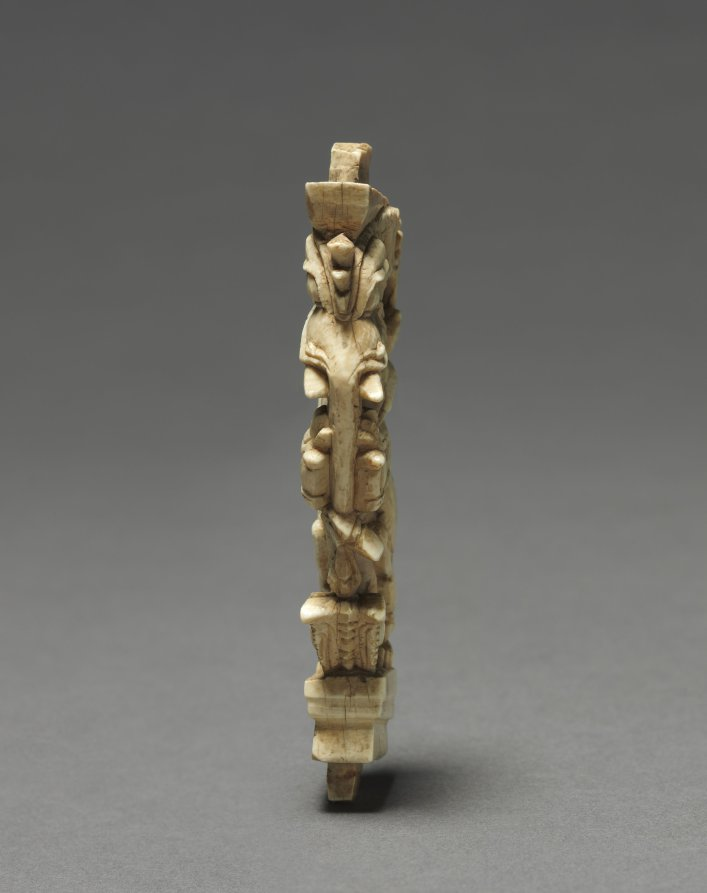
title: Carved Bracket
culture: South India, probably Madurai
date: 1600s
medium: Ivory with traces of pigment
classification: Ivory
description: Composite creatures with the body of a lion, tusks and trunk of an elephant, and horns of an antelope are standard elements of medieval Indian architecture and furniture. Traces of pigment indicate that these ivory furniture facings were brightly painted.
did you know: These composite beasts are called yali or vyala.